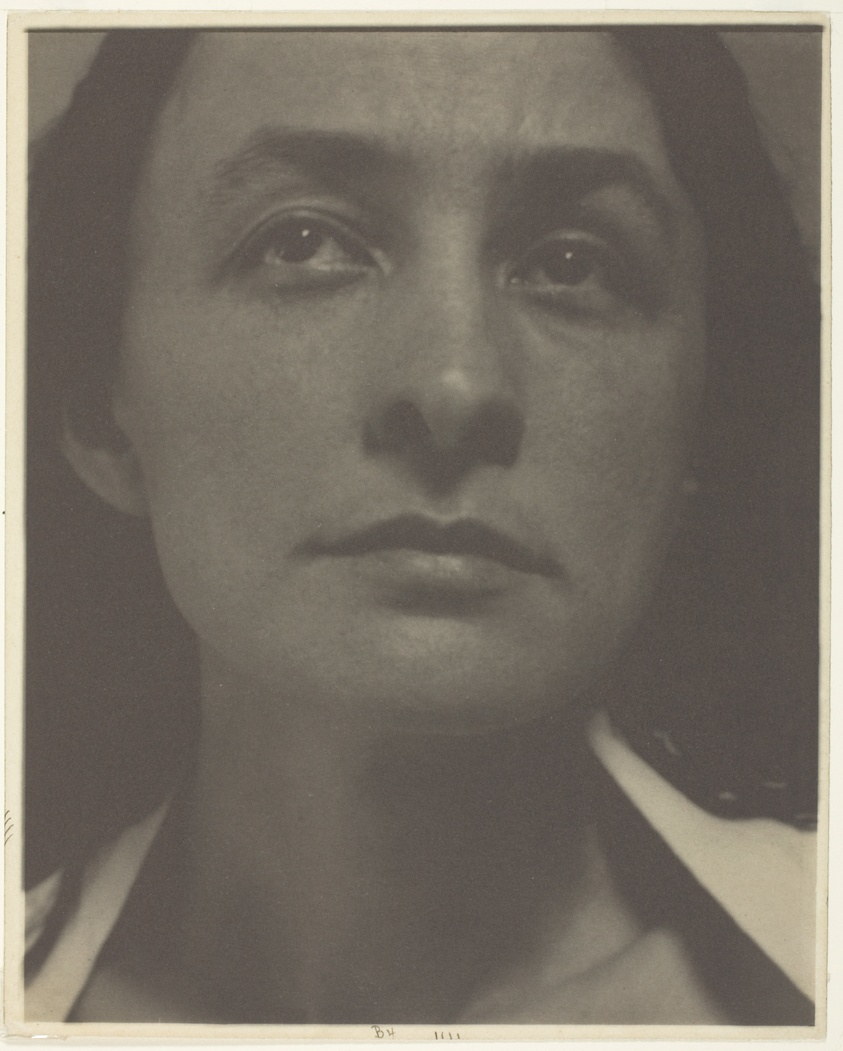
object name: Photograph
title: Georgia O'Keeffe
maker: Alfred Stieglitz (American, 1864–1946)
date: 1918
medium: Palladium print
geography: United States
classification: palladium print; photographic process; photography; photograph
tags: portraits, portraits: female subject, photography